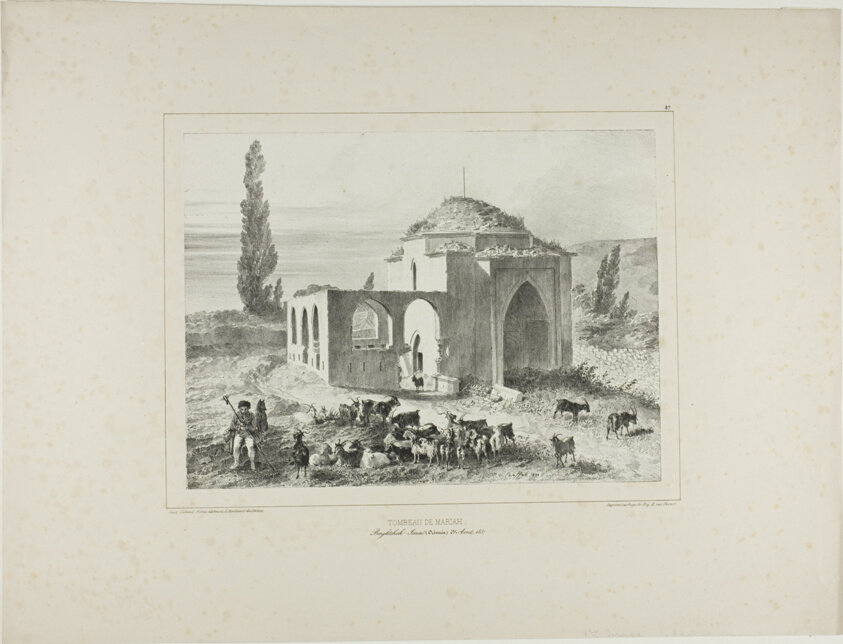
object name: Print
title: Mariah Tomb, Bachtcheh-Seraï, Crimea, August 21, 1837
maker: Denis Auguste Marie Raffet (French, 1804-1860); printed by Auguste Bry (French, 19th century); published by Chez Gihaut Frères (French, 19th century)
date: 1838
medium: Lithograph in black on grayish-ivory chine laid down on buff wove paper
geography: France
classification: lithograph; print; prints and drawing